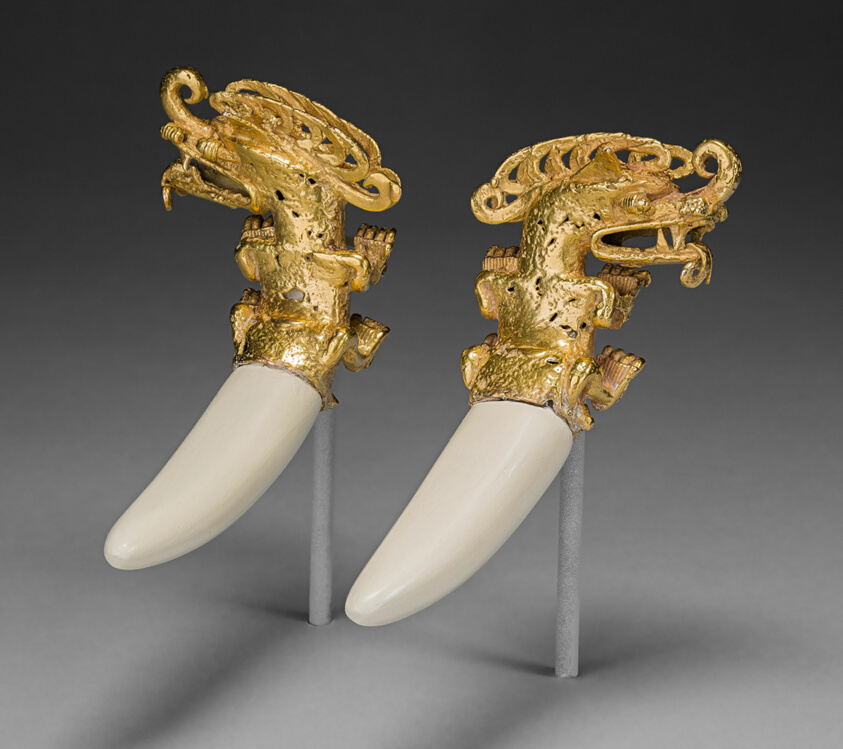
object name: Costume and Accessories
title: Double Pendant in the Form of a Mythical Saurian with Tusks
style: coclé, Pre-Columbian, americas, lower central america, Arts of the Americas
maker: Coclé (Coclé province, Panama)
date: 800–1200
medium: Gold with plaster restoration of boar tusks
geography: Panama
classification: pendant (jewelry); metal; jewelry; art of the americas; costume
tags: supernatural, animals, iguana, serpents, costume